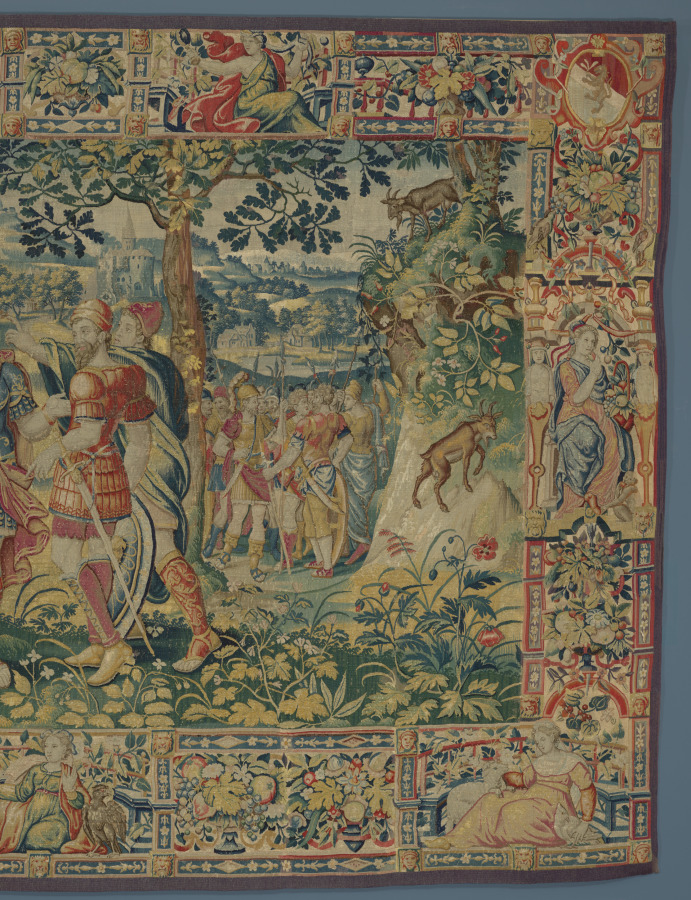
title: Romans Admiring the Sabine Women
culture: Belgium, Brussels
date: 1570–90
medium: silk and wool: tapestry weave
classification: Tapestry